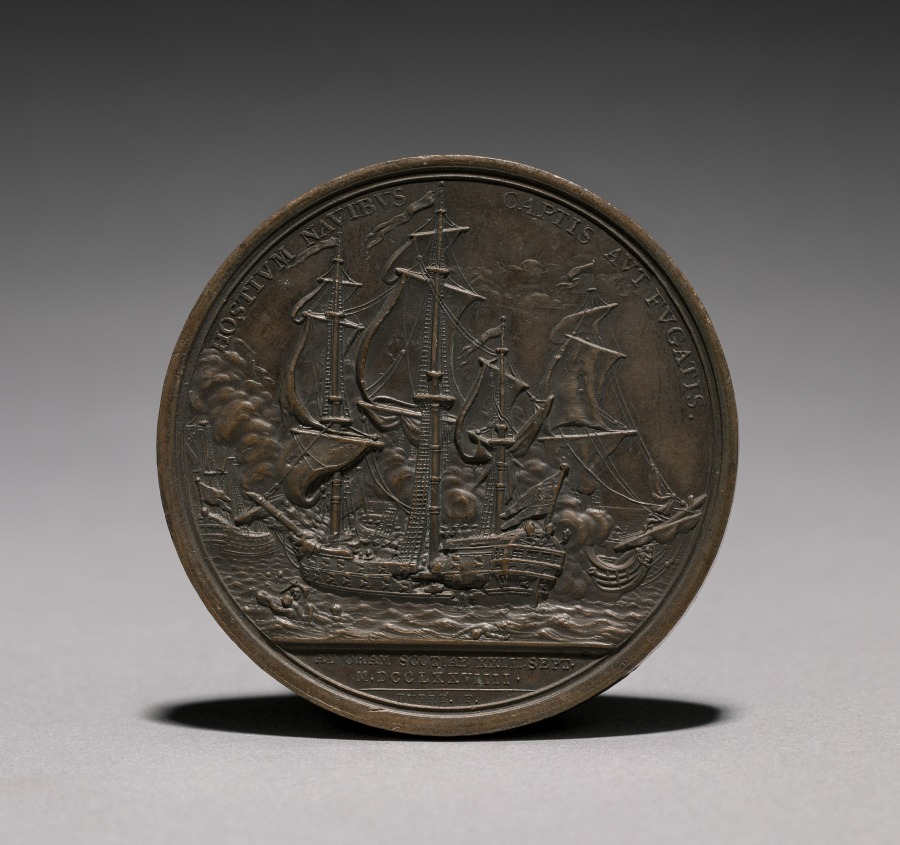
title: Medal: John Paul Jones (reverse)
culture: France, 19th century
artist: Jules Dupré (French, 1811–1889)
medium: bronze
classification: Metalwork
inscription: Hostivm Navibus Captivs avt Fvgatis ad Oram Scotiae XXIII Sept. MDCCLVIIII Dupre Sc.